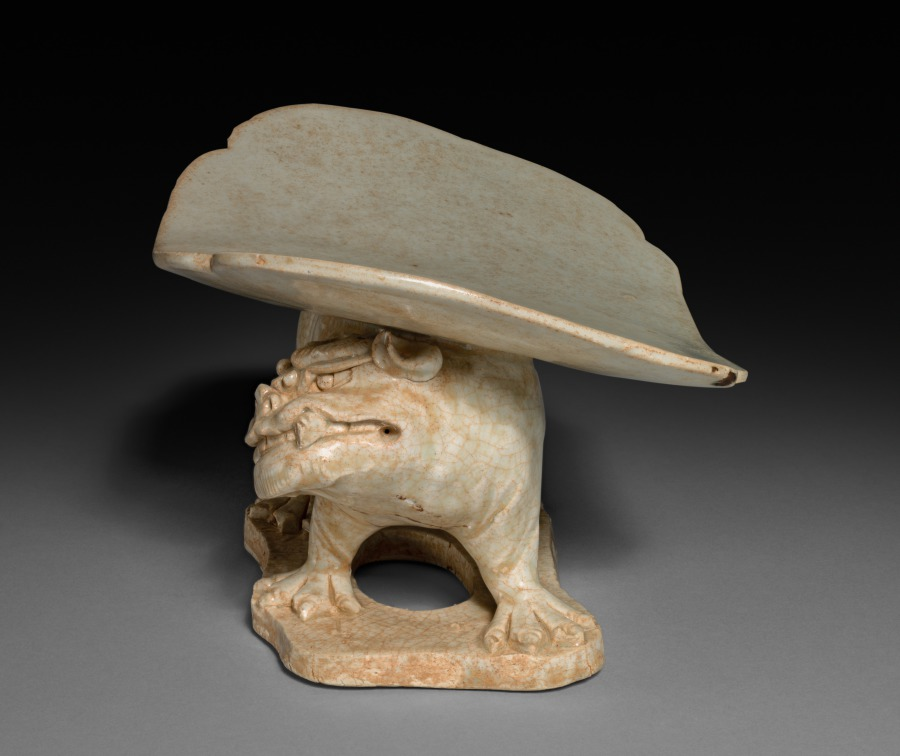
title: Pillow with Lion Base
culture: China, Northern Song dynasty (960-1127)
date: 1000s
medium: Glazed stoneware, qingbai ("blue-white") ware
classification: Ceramic